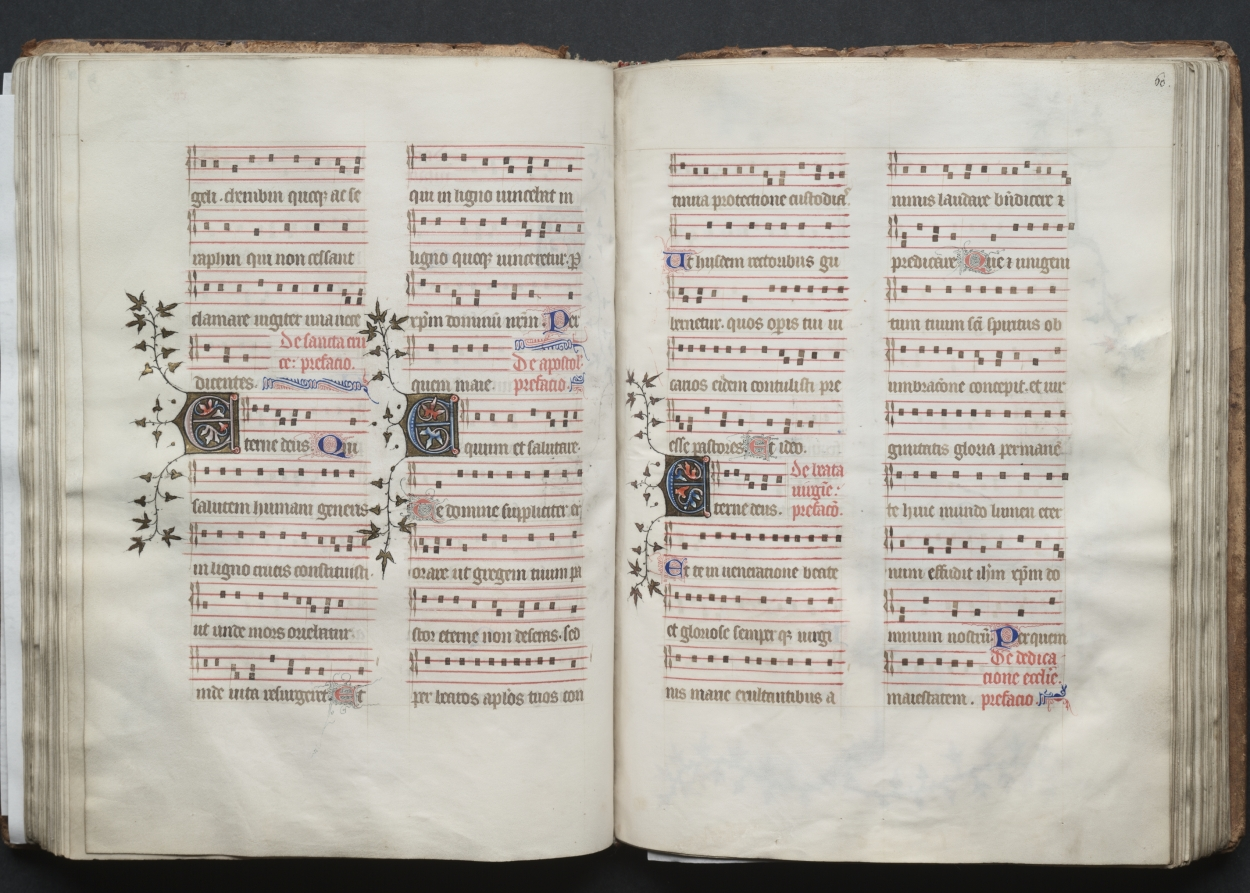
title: The Gotha Missal: Fol. 60r, Text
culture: France, Paris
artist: Master of the Boqueteaux (French)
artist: and Workshop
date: c. 1375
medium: ink, tempera, and gold on vellum; blind-tooled leather binding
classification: Bound Volume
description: The style and quality of this manuscript's decoration is typical of deluxe Parisian books made for aristocratic or royal patrons. Most of the book's decoration appears to be the work of the Master of the Boqueteaux, an artist active at the court of King Charles V (died 1380). His style was apparently shared by a number of book illuminators working in and around Paris. It is very possible that the Gotha Missal belonged to Charles V, but is not provable because the manuscript has no royal portraits and lacks a colophon. Given the book's magnificent decoration, however, it would seem that it was produced for a Valois prince, if not for the king himself. The manuscript receives its name from the German dukes of Gotha, its later owners.